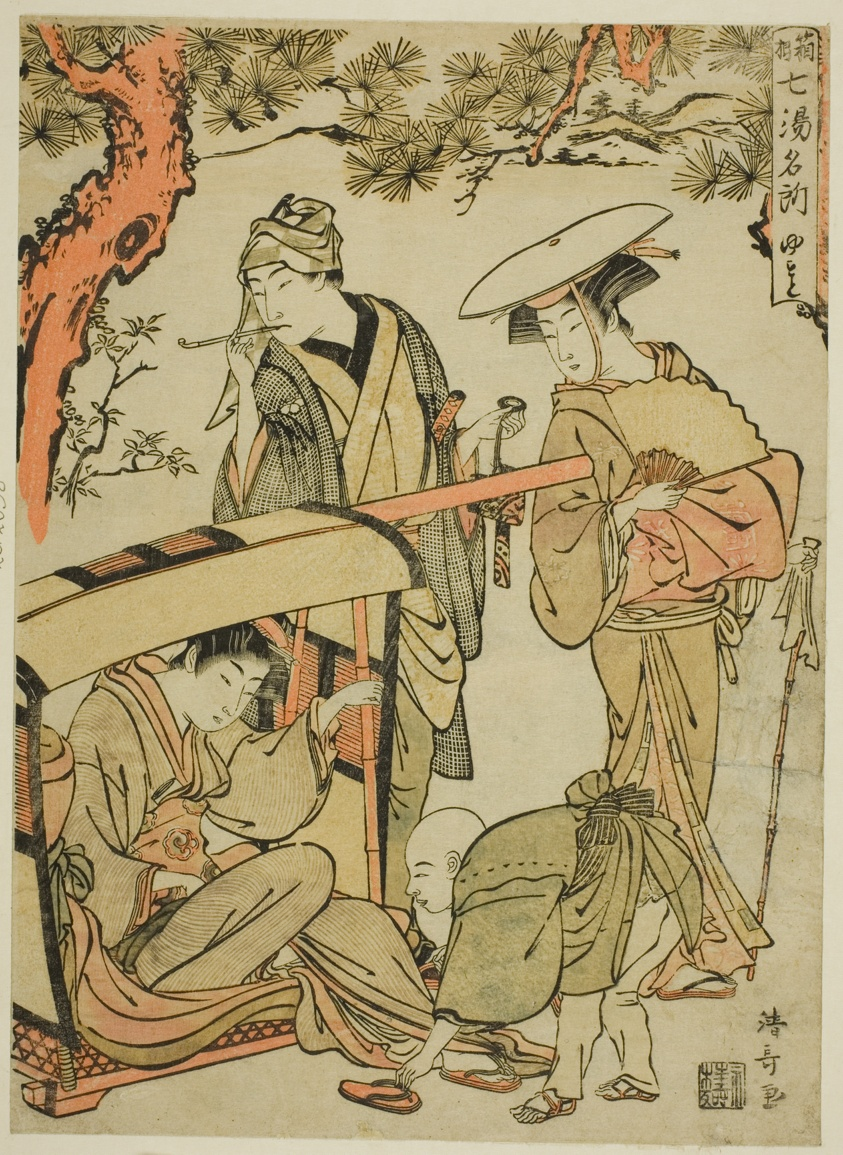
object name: Print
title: Yumoto, from the series "Seven Famous Hot Springs of Hakone (Hakone shichito meisho)"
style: Japanese (culture or style)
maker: Torii Kiyonaga (Japanese, 1752-1815)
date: c. 1780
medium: Color woodblock print; chuban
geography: Japan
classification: woodblock print; print; asian art